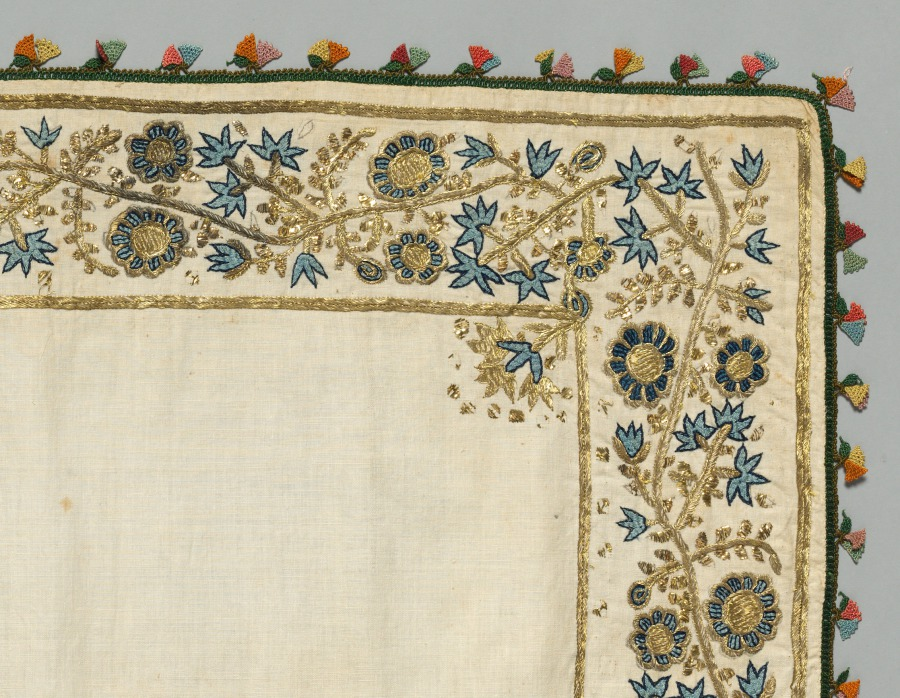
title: Garment or furnishing textile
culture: Africa, North Africa, Tunisia, Tunisian embroiderer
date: early 1900s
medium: Linen, silk, metal, dye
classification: Embroidery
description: Artistic trends and fashions circulated widely during the late 1800s and early 1900s. The embroidered floral borders and delicate trim on this woven linen textile resembles those made across the Ottoman Empire's territories in the eastern Mediterranean. At this time, Tunisia was ruled by the Husaynid dynasty, which was loosely affiliated with the Ottoman court.